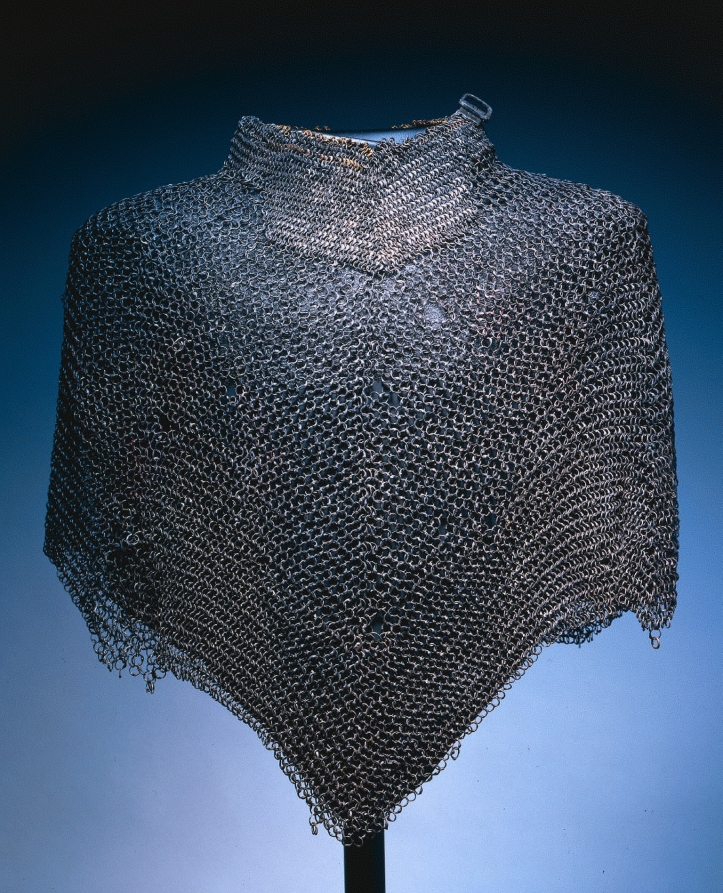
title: Bishop's Mantle (Cape)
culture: European (German or Swiss?), early 16th century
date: c. 1520–30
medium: riveted steel (some brass) rings; reinforced collar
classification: Arms and Armor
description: Chain mail capes known as "bishop's mantles" were popular with German mercenary foot soldiers between about 1500 and 1550. They were often worn as the only element of armor.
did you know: In 805 an edict of Charlemagne established a link between the right to own land and the obligation to own a chainmail shirt.